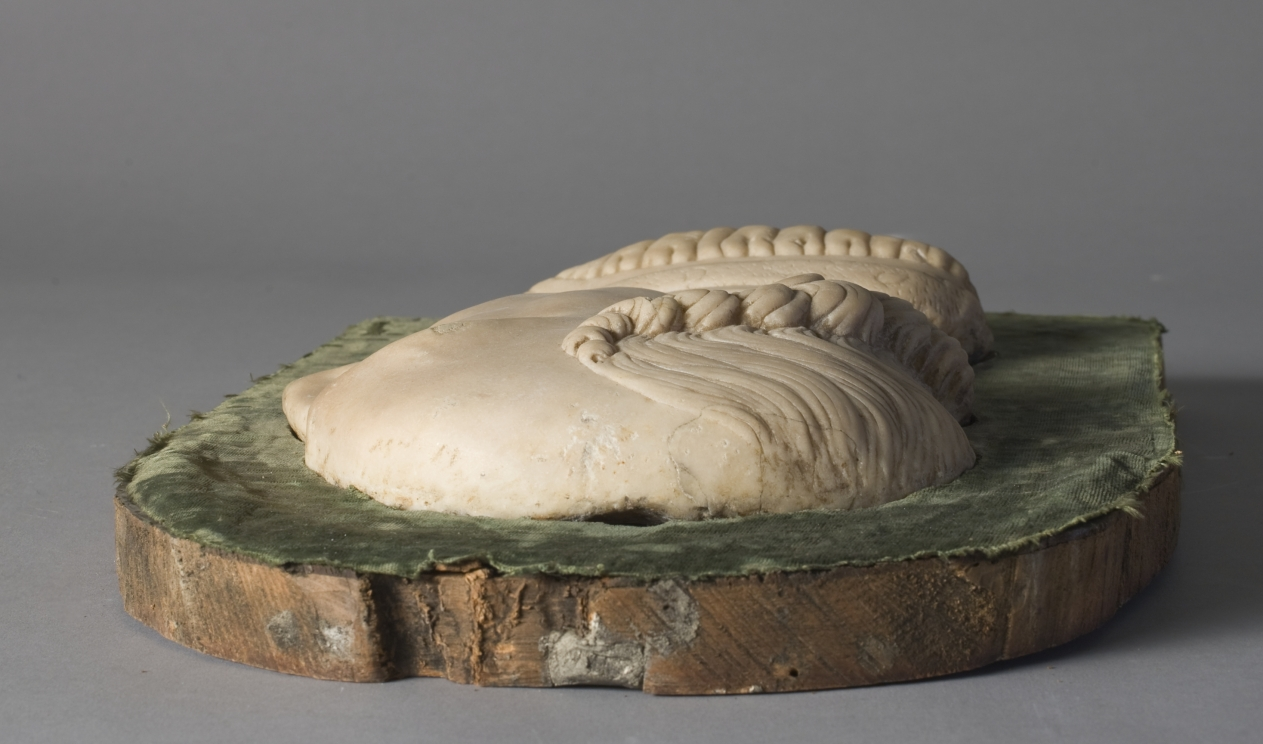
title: Portrait of Francesco Sforza and Frame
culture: Italy, Lombardy, 15th century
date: 1450–1499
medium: marble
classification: Sculpture